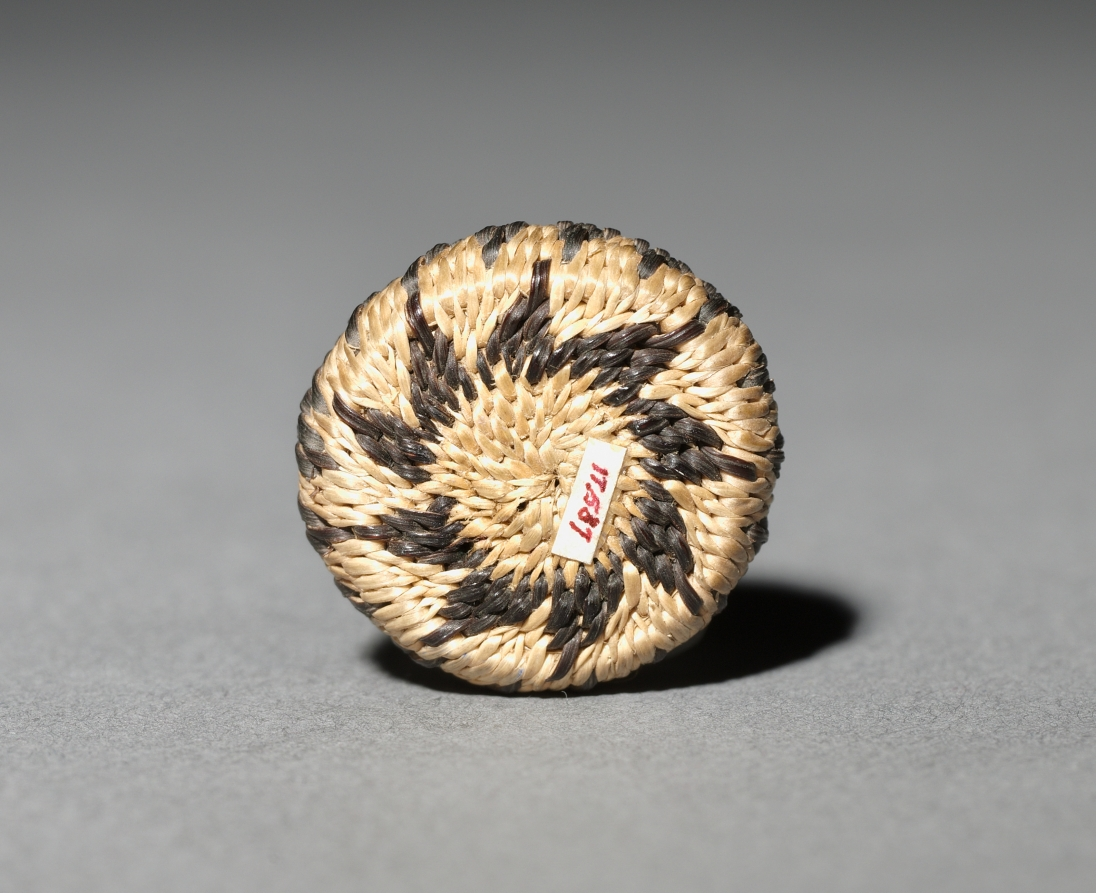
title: Miniature Round Basket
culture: California, Pomo, late 19th-early 20th century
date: late 1800s-early 1900s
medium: plant materials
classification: Basketry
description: Miniature baskets were made to demonstrate the basket-maker’s virtuoso skill, and these tiny marvels seem to be no exception—the smallest are just a few millimeters wide but still patterned. For such fine work, dexterity was required as much for preparation of materials as for weaving.